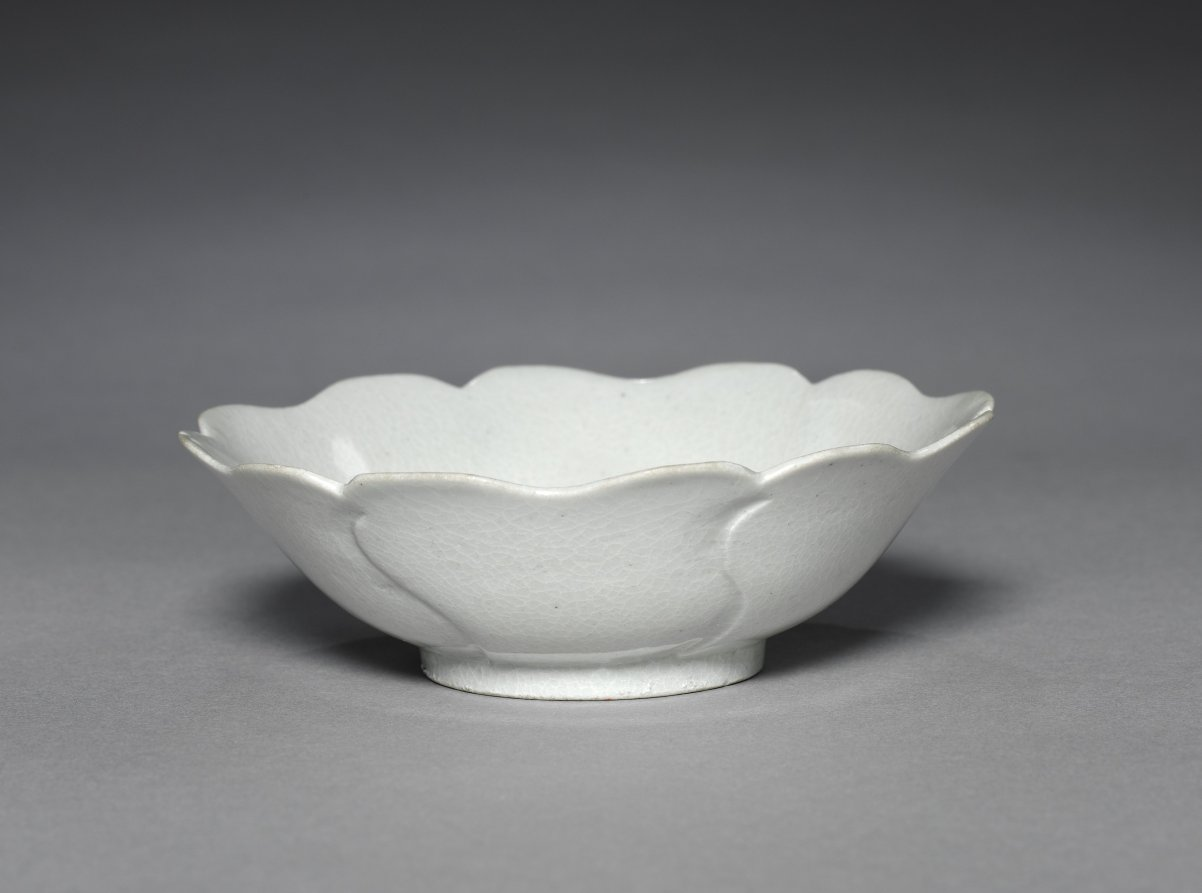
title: Hollyhock-shaped Cup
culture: Korea, Joseon dynasty (1392–1910)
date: 1400s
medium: porcelain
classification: Ceramic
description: This very rare porcelain cup is called a hollyhock cup because its rim resembles a hollyhock blossom. This type of cup was produced only in the state-owned kiln for a limited time from the late 1400s to mid-1500s. Like sunflowers, hollyhocks also open their blooms toward the sun, signifying loyalty to the king. According to Korean royal archives, hollyhock cups were used during state banquets when the king offered wine to court officials. Also, a hollyhock-shaped cup was used in tea ceremonies to welcome visiting Chinese diplomats. In comparison to ceramic works of the late Joseon period that favor natural and rustic sensibilities seen in this gallery, this hollyhock cup illustrates the precision and perfection that were core aesthetic values of early Joseon period art.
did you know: This cup shaped like a hollyhock flower was used in tea ceremonies to welcome visiting Chinese diplomats during the Joseon period (1392–1910).